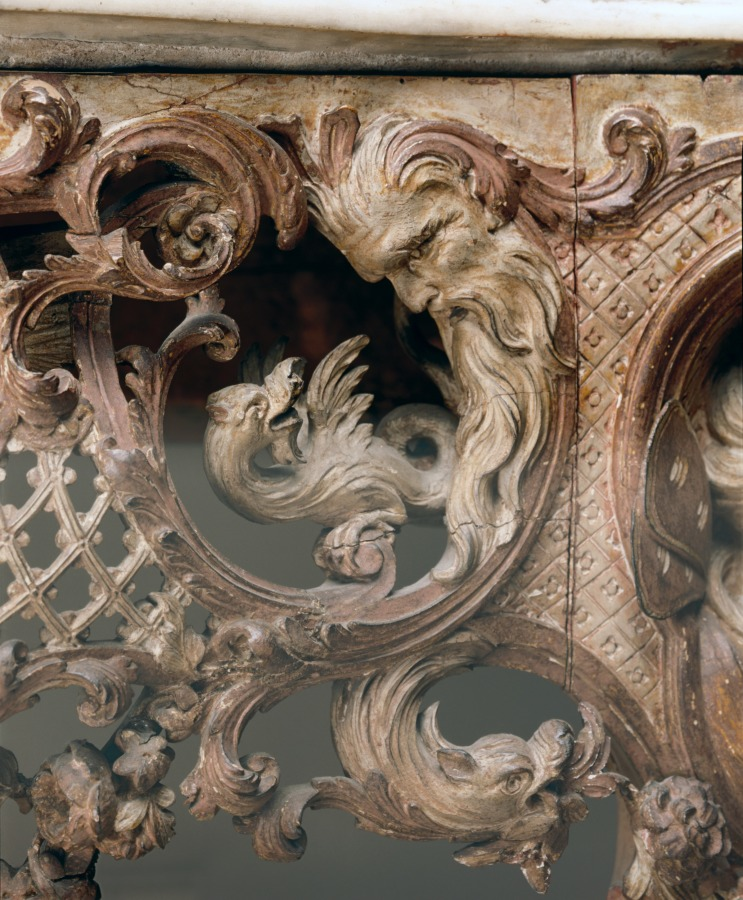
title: Console Table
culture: France, 18th century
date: c. 1720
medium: carved and painted wood, marble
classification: Furniture and woodwork